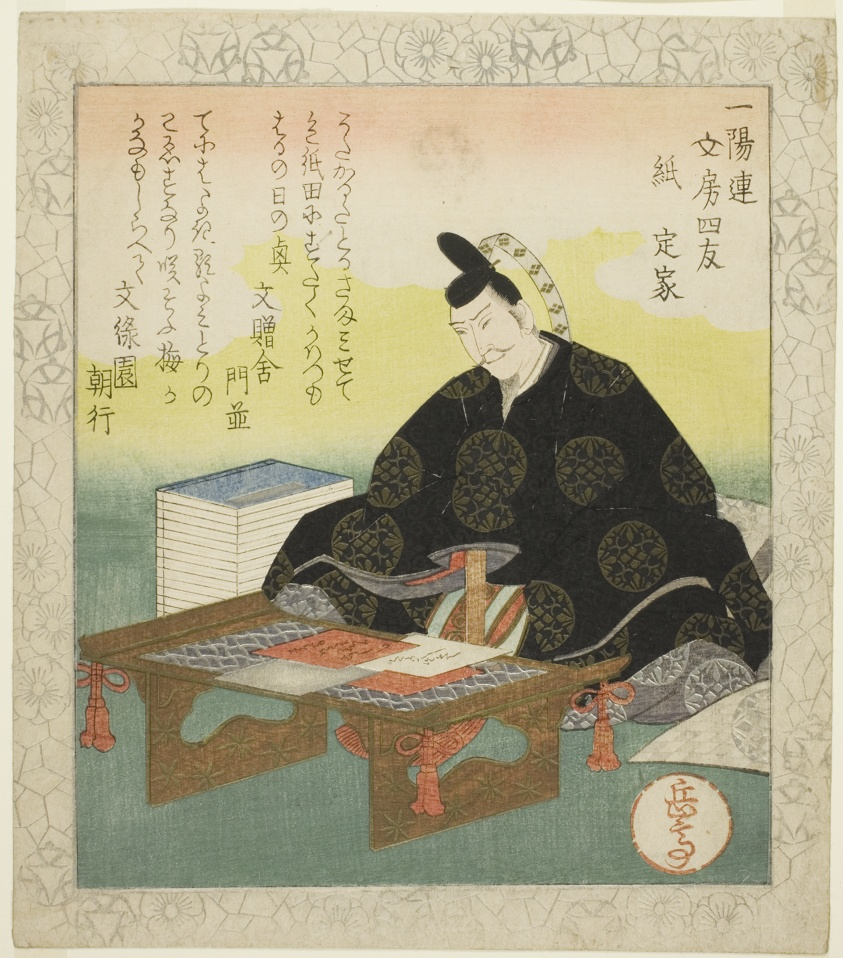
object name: Print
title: Paper: Fujiwara no Sadaie (Kami: Teika), from the series "The Four Friends of the Writing Table for the Ichiyo Circle (Ichiyoren bunbo shiyu)"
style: Japanese (culture or style)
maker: Yashima Gakutei (Japanese, 1786 (?)-1868)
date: c. 1827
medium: Color woodblock print; shikishiban, surimono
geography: Japan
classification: woodblock print; print; asian art